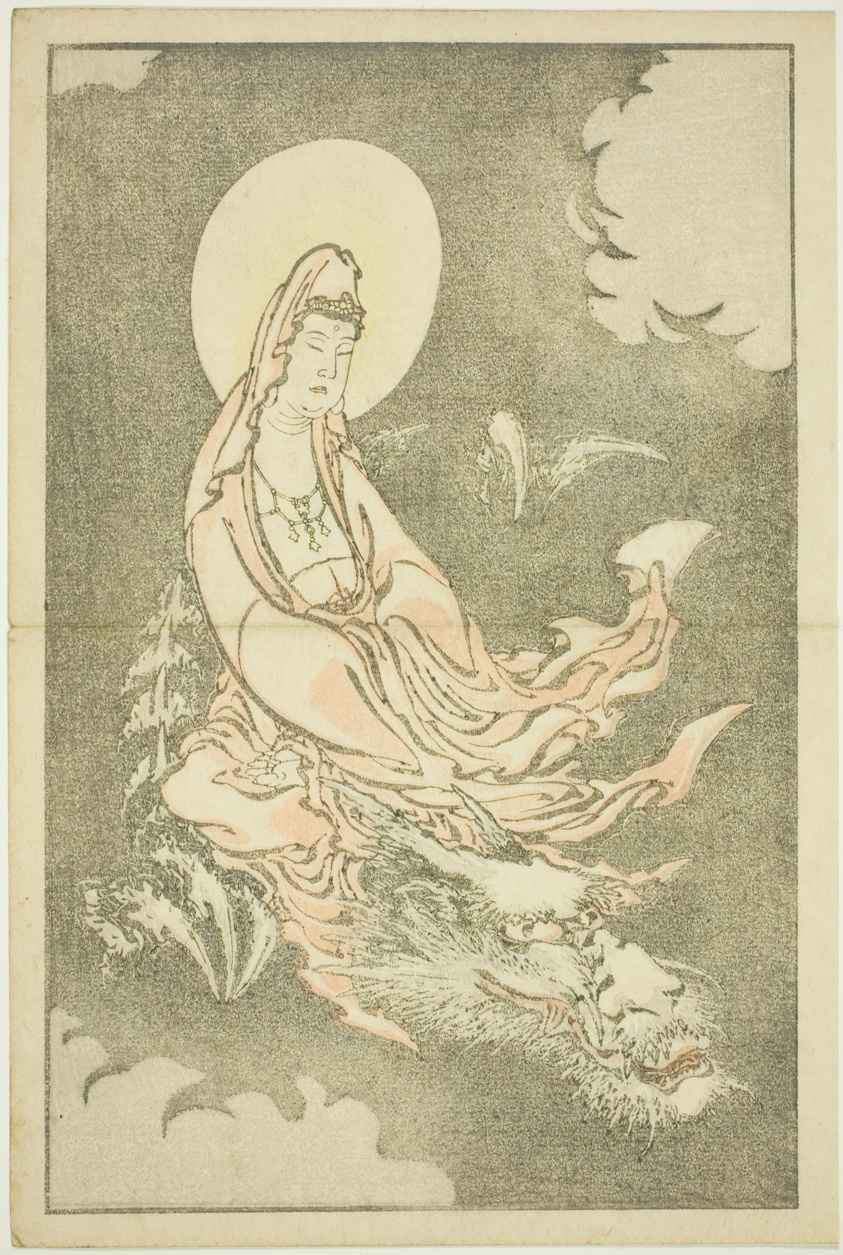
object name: Print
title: Goddess Riding a Dragon, from The Picture Book of Realistic Paintings of Hokusai (Hokusai shashin gafu)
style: Japanese (culture or style)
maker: Katsushika Hokusai 葛飾 北斎; Japanese, 1760-1849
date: c. 1814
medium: Color woodblock print (album sheet)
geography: Japan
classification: woodblock print; print; asian art